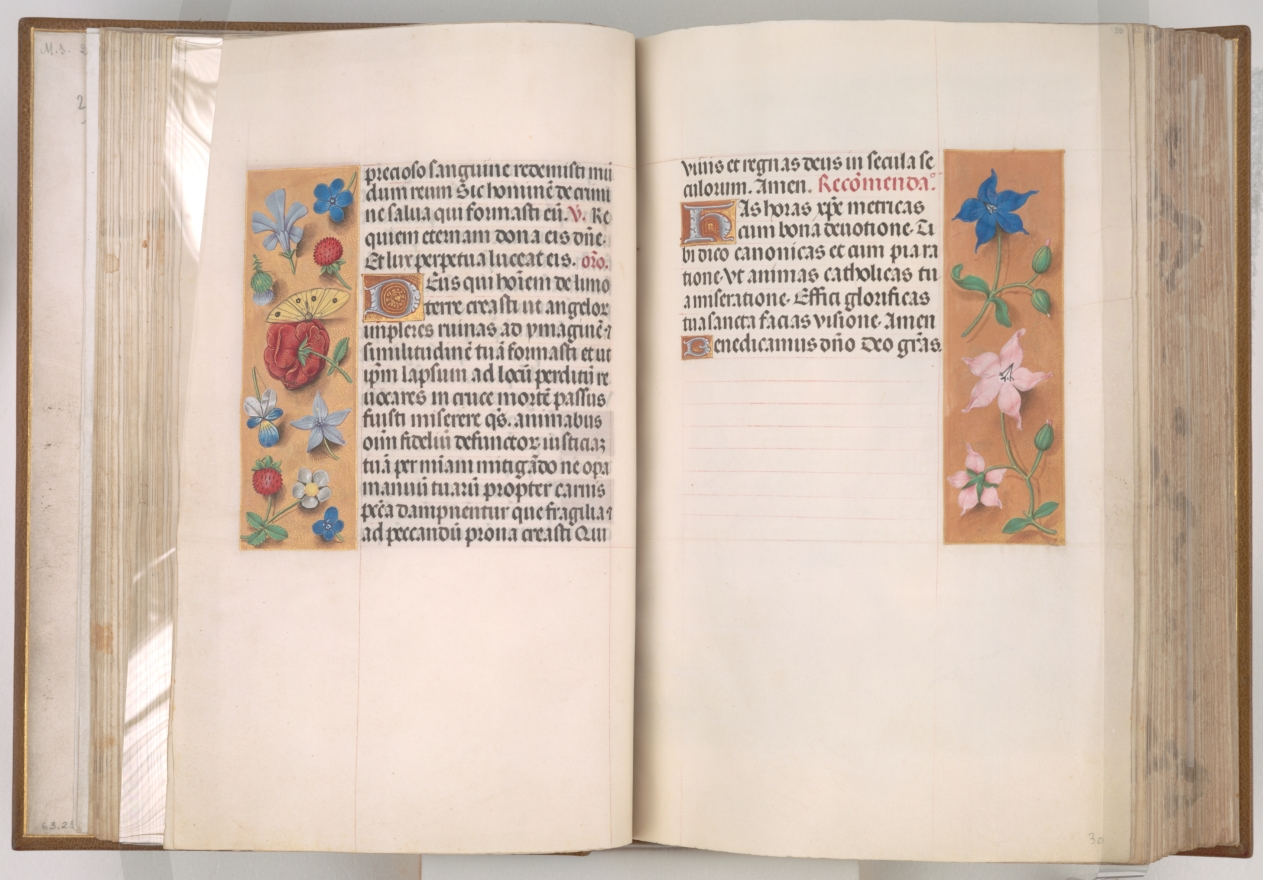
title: Hours of Queen Isabella the Catholic, Queen of Spain: Fol. 30r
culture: Flanders, Ghent and Bruges, late 15th century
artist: Master of the First Prayerbook of Maximillian (Flemish, c. 1444–1519)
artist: and Associates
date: c. 1500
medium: ink, tempera, and gold on vellum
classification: Bound Volume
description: A great lover of Flemish art, Queen Isabella treasured her many devotional books. This deluxe manuscript was created for her private devotions by highly organized and distinctly talented manuscript painters active in Ghent and Bruges. The Ghent-Bruges school represents the culmination of Flemish book painting, whose main features were the use of rich colors, illusionistic effects, a love of landscape, and a strong sense of visual narrative. Manuscripts produced by this circle of artists are renowned for their border decoration featuring a rich variety of realistically painted flowers, scrolling acanthus leaves, birds, and butterflies.